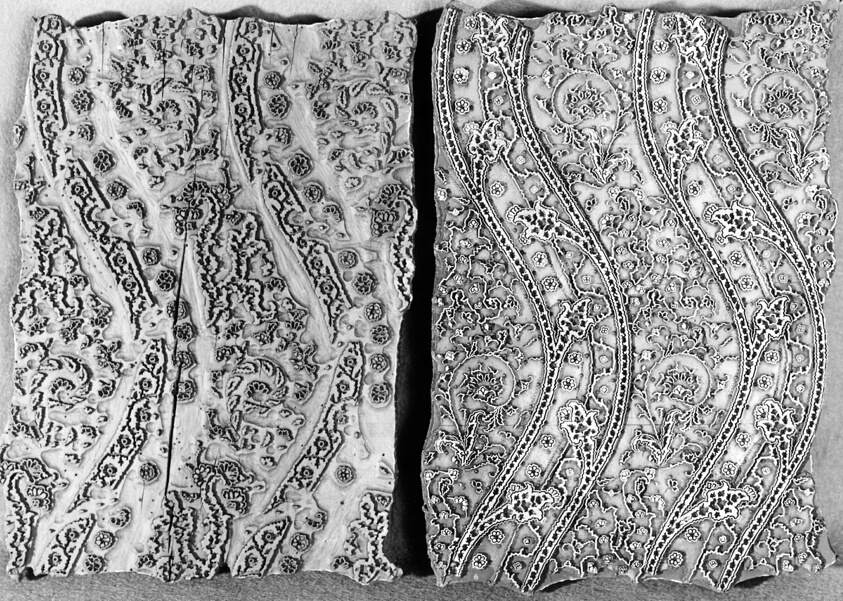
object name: Textile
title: Two Printing Blocks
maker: England or France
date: c. 1860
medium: Wood and metal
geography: England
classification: printing blocks (printing surfaces); textile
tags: flowers